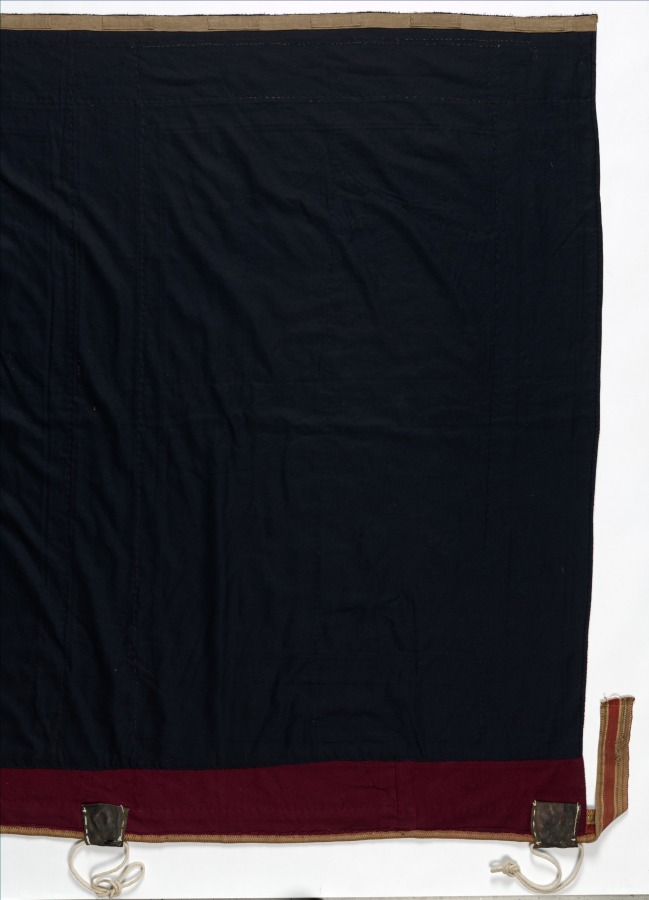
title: Royal Round Tent made for Muhammad Shah (wall panel with three design units)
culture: Iran, Rasht, Qajar period (1779-1925)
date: 1834–48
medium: Wool with silk embroidery (chain stitch), rope, cotton, leather, tape; Rasht work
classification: Textile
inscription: Inscriptions: The central design unit of this wall panel has two embroidered inscriptions. 1. Upper inscription (center of the top blossom): "Muhammad shah sultan-e ghazi."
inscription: 2. Lower inscription (on the base of the vase): "Kamtarin bandeh-ye dargah fath'ali."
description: Royal tents were potent symbols of authority, wealth, and power throughout the greater Middle East. Rulers owned thousands of tents. They were used for shelter, shade, and innumerable functions in tent compounds that were essential for imperial ceremonies, travel, and military campaigns. Distinguished by size with elaborately decorated interior walls and ceilings, tents could be as large as castles. Opulent tents were also presented as imperial gifts. Tents are only known through documents before 1600. For example, in Baghdad in 809, Caliph Harun al-Rashid owned 4,000 ceremonial tents and 150,000 camping tents that were stored in the imperial Abbasid treasury. An astonishing variety and quantity of tents were housed in the royal Fatimid tent storeroom in Cairo in 1068-69, including "military tents, fortress tents, and castle tents, manufactured of . . . gold-brocaded stuff embroidered with designs of elephants, wild beasts, horses, peacocks, birds." Since 1600, Ottoman Turkish tents with elaborate floral decoration have been preserved in Istanbul in the Topkapi Palace Museum and Military Museum, and in European collections as war booty, primarily from the Ottoman Turks' attempt to conquer Vienna in 1683. These tents are not done in the Rasht technique, but rather are applique. In contrast, royal tents from Iran are extremely rare. This spectacular ceremonial tent is embroidered with the name of its owner, Muhammad Shah, who ruled Iran from 1834 to 1848 during the Qajar dynasty. The radiant jewellike interior features exuberant flora, blossoming vines, and robust birds made with colored wool embellished with silk-thread embroidery.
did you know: Rasht work is named after the city on the Caspian Sea in present-day Iran, which was a major silk trade center with numerous textile workshops.